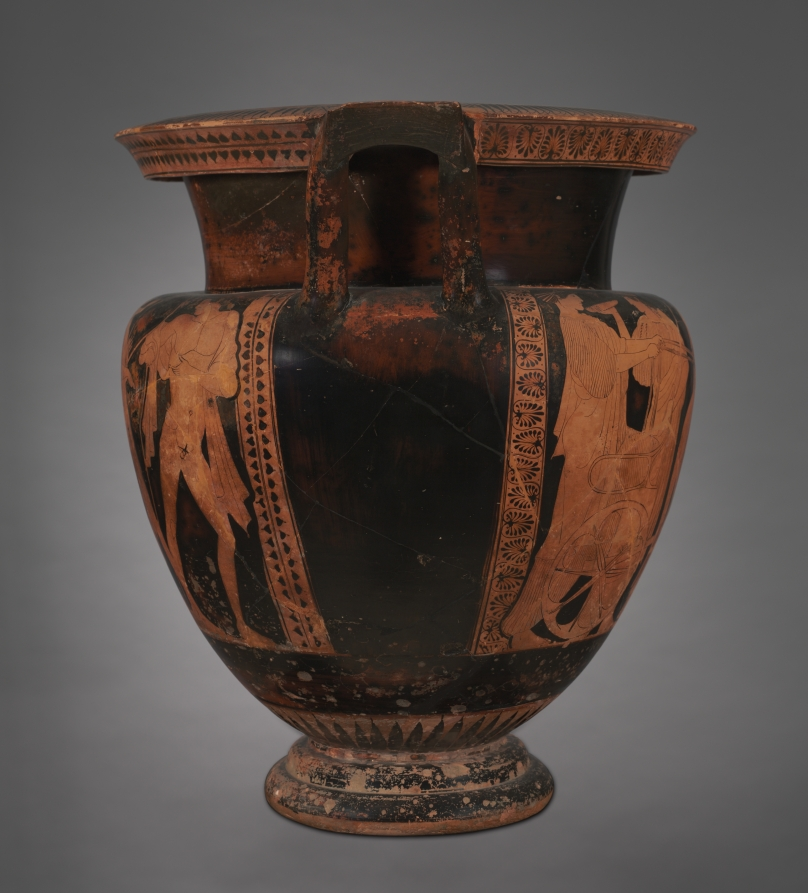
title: Red-Figure Column Krater (Mixing Vessel): Apollo and Goddesses with Chariot (A); Komos (Revel) (B)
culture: Greek, Attic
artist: attributed to Cleveland Painter (name vase; Greek, Attic, active c. 470–460 BCE)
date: c. 470–460 BCE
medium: ceramic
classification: Ceramic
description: Since this column-krater is the most important of 12 vases painted by a Greek artist whose name is unknown, the great English vase expert, Sir John D. Beazley, named him (or her) the Cleveland Painter, after our city. Other vases by the Cleveland Painter are now in New York, Vienna, Paris, and Copenhagen, as well as museums in Greece and Italy. The chariot scene on the main side of the vessel is a divine one, as indicated by the presence of Apollo, identified by his lyre and laurel wreath. With him are three goddesses, probably his sister Artemis (facing him), together with Hera (wearing a crown and holding a scepter and libation dish), and Hebe, the daughter of Zeus and Hera, on her way to meet her future husband, Herakles.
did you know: The revelers on this vessel dance to the music of the barbiton, a stringed instrument associated with leisure and luxury.